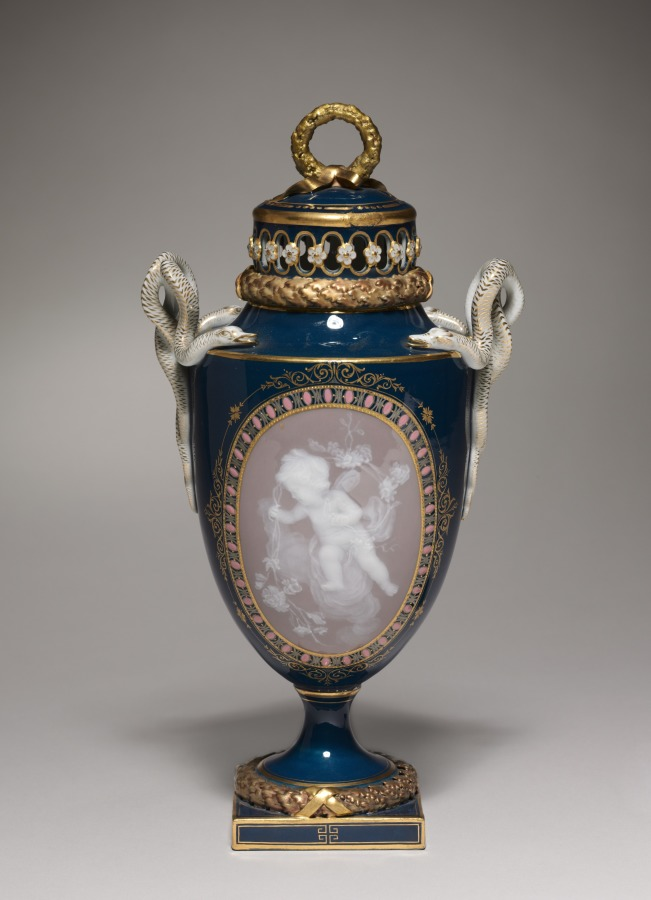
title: Covered Vase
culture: Germany, 19th century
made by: Meissen Porcelain Factory (German, est. c. 1710)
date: 1881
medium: porcelain with pâte-sur-pâte decoration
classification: Ceramic